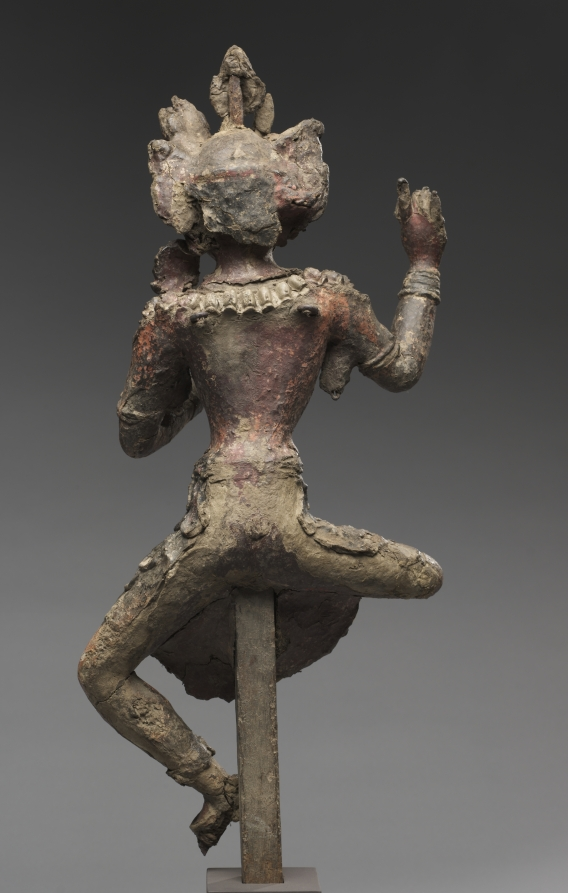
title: Goddess Vajravarahi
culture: Nepal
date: c. 1040–c. 1310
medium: unbaked clay and pigment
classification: Sculpture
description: This powerful red goddess dances vigorously and raises one hand that would have held a flaying knife, while the other once held a skull cup. Her bone skirt and garland of freshly severed heads complement the skulls that adorn her crown. Her eyes bulge, her brow furrows, and she bares her teeth. These attributes communicate her power to assist her followers in overcoming passions, ignorance, and fear. This is one of the earliest surviving images made of unbaked clay, using an iron armature and rope strings to support the ornament.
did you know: The wooden post is an original and would have been set into a sculpted corpse.